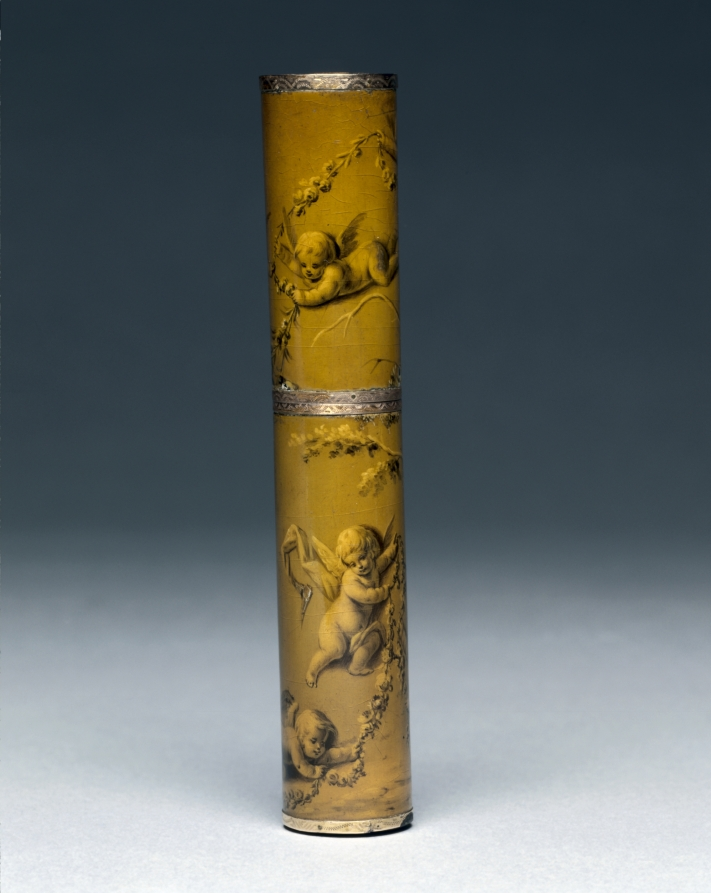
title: Needle Case (Etui à Aiguilles)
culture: France, Paris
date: 1768–69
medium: painted wood, gold mounts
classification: Miscellaneous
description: The material of cases like these delineated the status of the holder. More expensive materials such as ivory, tortoiseshell, or silver were reserved for wealthier users while more common cases were made of lacquered papier-mâché or wood. This wooden case is decorated with vernis martin, a domestic varnish imitating East Asian true lacquer. The sinuous lines, floral garlands, and putti, personifications of love in the form of winged infants, exemplify typical rococo imagery.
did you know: In the 1500s these cases were commonly fabricated to hold pins and needles for master tailors, but became more widely produced for women during the 1700s.